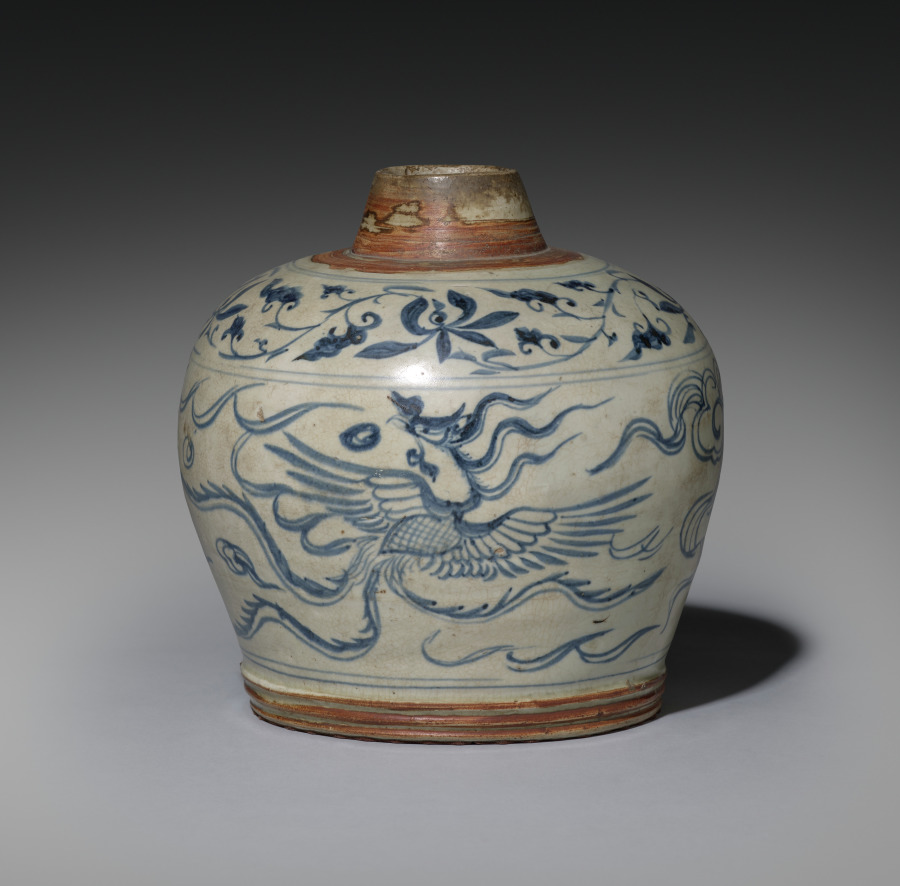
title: Covered Jar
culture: Vietnam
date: 1500s–1600s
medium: stoneware with blue and white decoration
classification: Ceramic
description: This stoneware ginger jar is decorated with a blue and white phoenix among clouds (a symbol of longevity) and floral motifs.